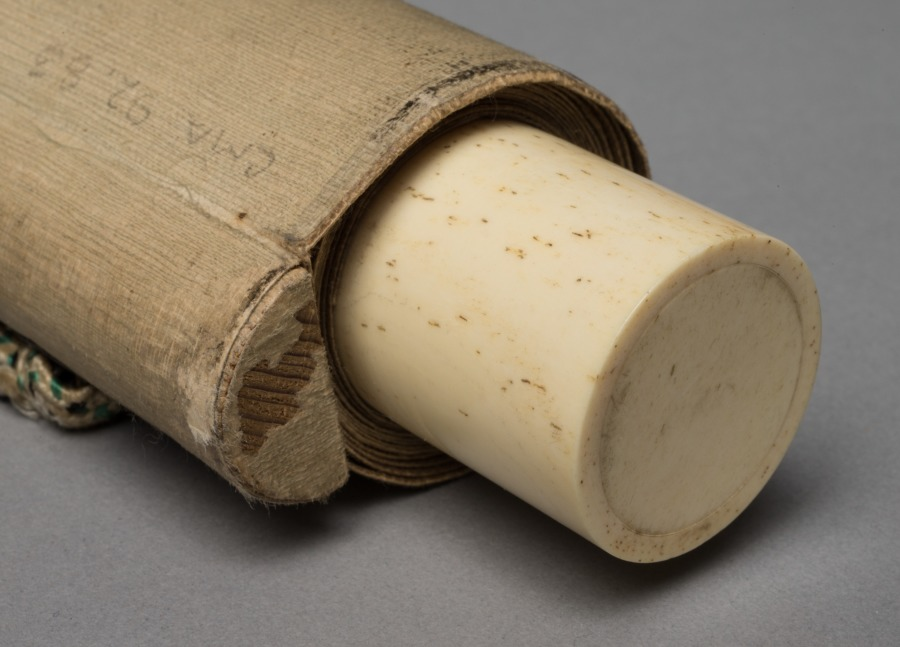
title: Chinese Sages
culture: Japan, Edo period (1615–1868)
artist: attributed to Kano Tan’yū (Japanese, 1602–1674)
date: mid- to late 1600s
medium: hanging scroll; ink and color on silk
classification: Painting